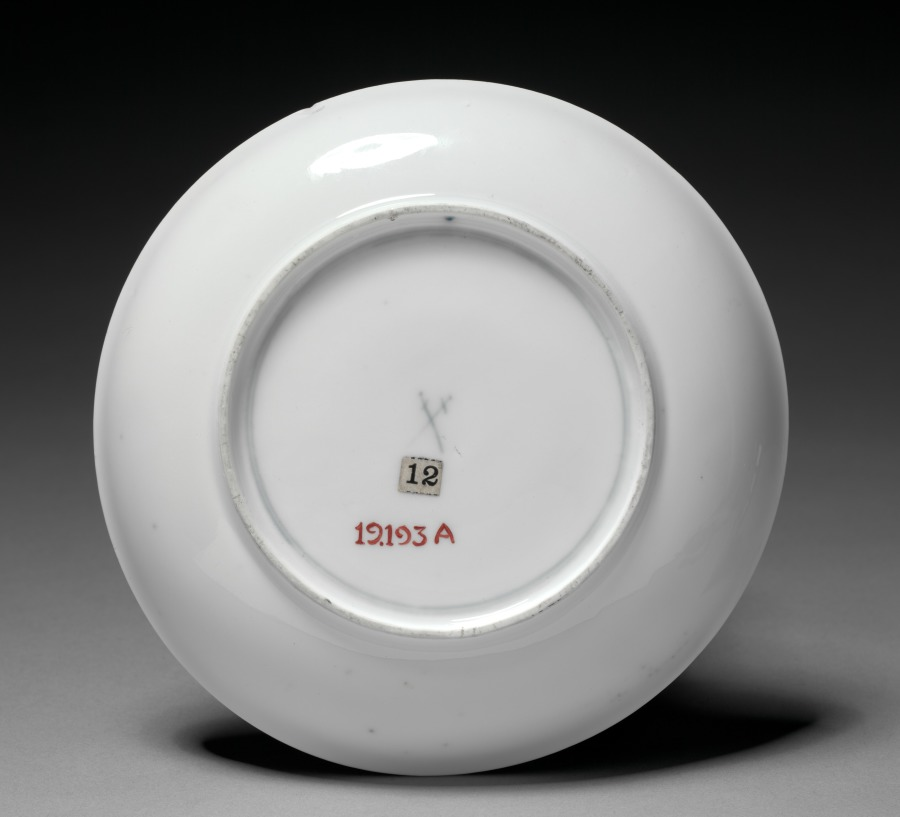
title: Stand for a Covered Broth Bowl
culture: Germany, Meissen, 18th century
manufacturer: Meissen Porcelain Factory (German, est. c. 1710)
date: 1730–40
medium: gilt porcelain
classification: Ceramic